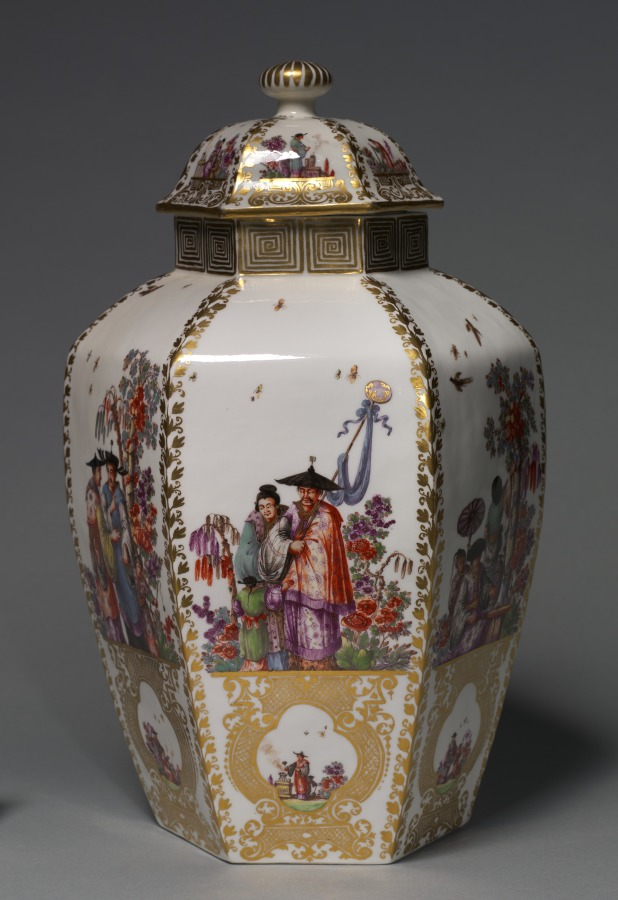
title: Covered Vase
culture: Germany, Meissen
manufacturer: Meissen Porcelain Factory (German, est. c. 1710)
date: c. 1728–30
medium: porcelain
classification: Ceramic